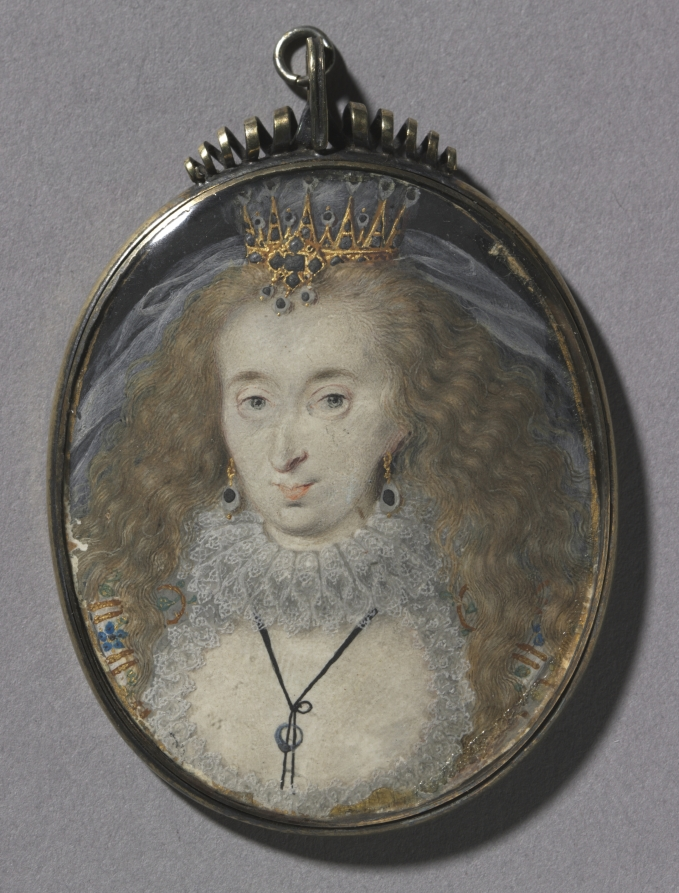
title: Portrait of Lucy Russell, Countess of Bedford, née Harrington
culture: England, early 17th century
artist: Isaac Oliver (French, c. 1565–1617)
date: c. 1608–1616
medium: watercolor on vellum with gold and silver in a 17th-century silver gilt frame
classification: Portrait Miniature